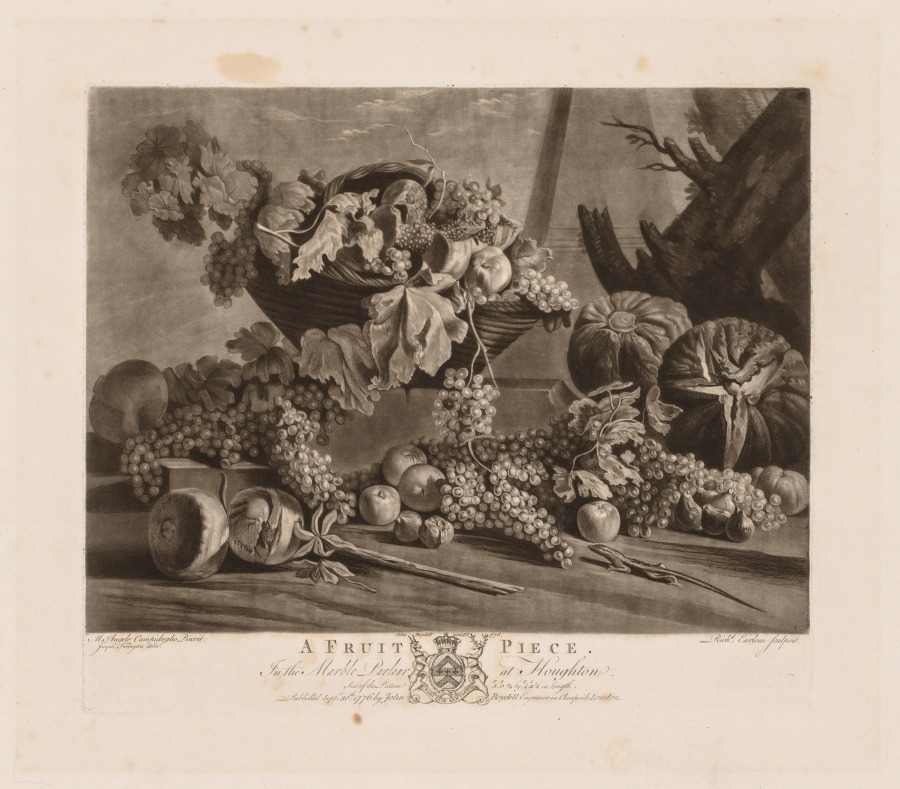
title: A Fruit Piece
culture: England, 18th century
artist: Richard Earlom (British, 1743–1822)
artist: after Joseph Farington (British (modern), 1747–1821)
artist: after Michelangelo di Campidoglio (Italian, 1610–1670)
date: 1776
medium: mezzotint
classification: Print